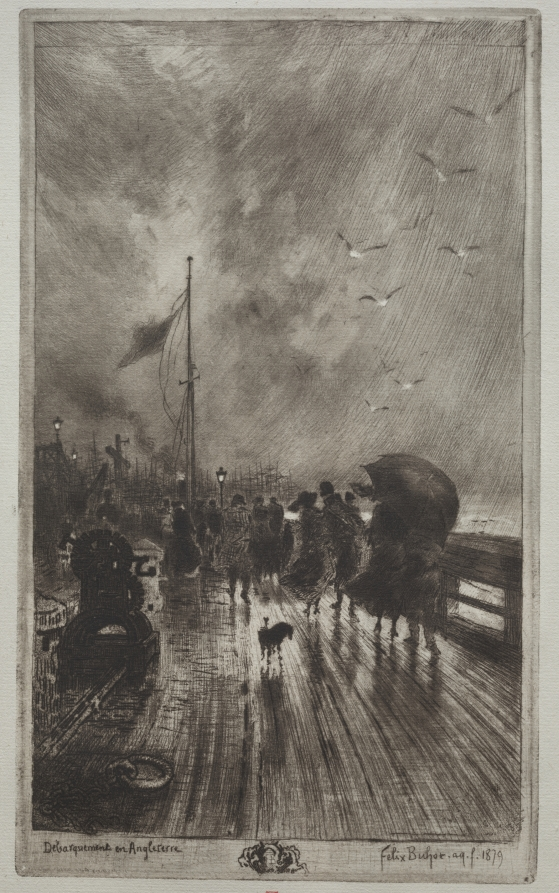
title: Landing in England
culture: France, 19th century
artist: Félix Hilaire Buhot (French, 1847–1898)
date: 1879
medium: etching, aquatint, drypoint and roulette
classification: Print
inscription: titled, lower left, in plate: Debarquement en Angleterre; signed and dated, lower right, in plate: Felix Buhot 1879